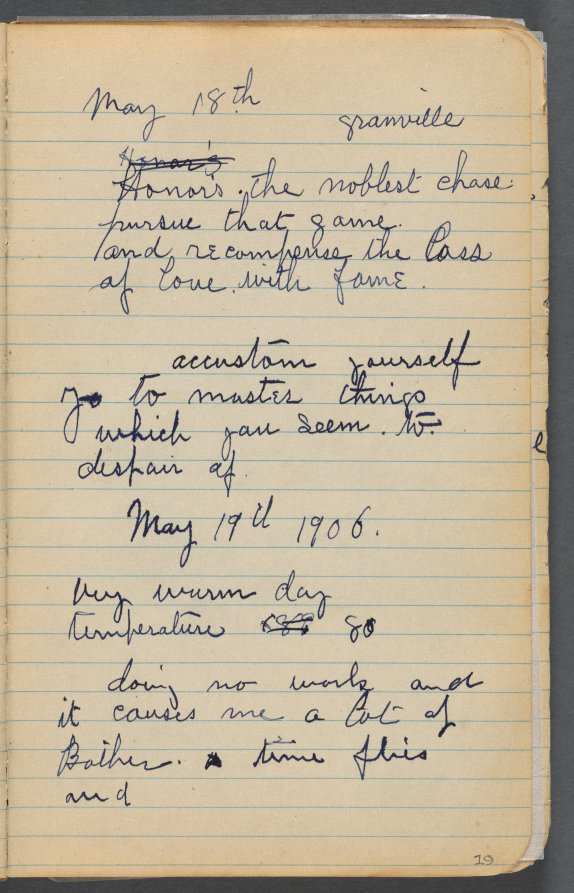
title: Sketchbook, page 019: Notes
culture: America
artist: Maurice Prendergast (American, born Newfoundland [now Canada], 1858–1924)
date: 1905–10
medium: graphite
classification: Bound Volume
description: This sketchbook contains 69 pages of drawings, a diary largely devoted to the state of the artist's health, and a three-page discourse on the nature of genius and ideas.